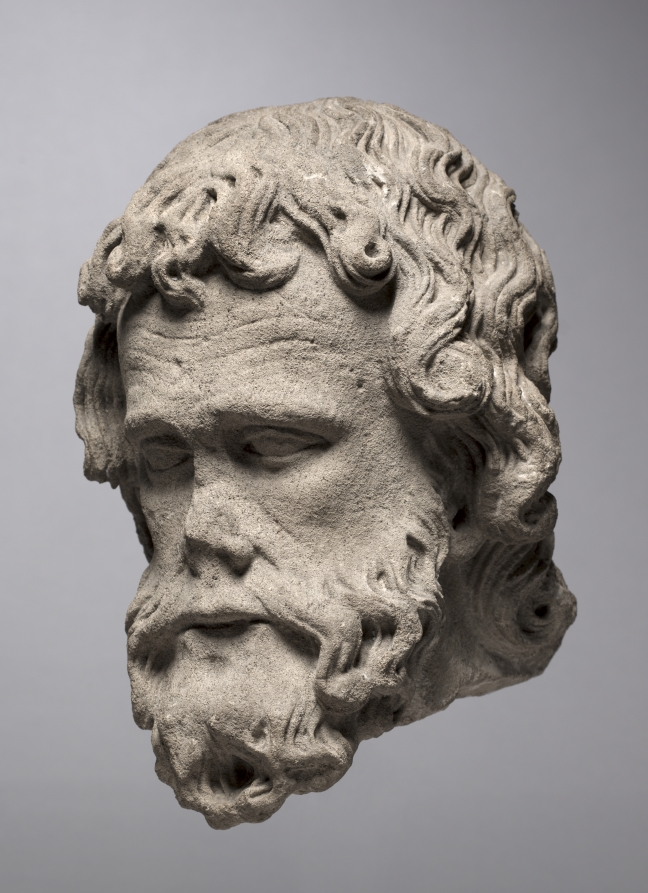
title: Head of an Apostle from the South Portal of the Cathedral of Thérouanne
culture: Northern France (Pas-de-Calais), Thérouanne, 13th century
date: c. 1235–1240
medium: oolitic limestone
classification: Sculpture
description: These monumental stone heads are among the substantial known remains of the sculptural program of Thérouanne’s cathedral, which was razed by Emperor Charles V of Spain in June 1553. These heads were found in a wall of rue Ste. Croix in the town of Saint Omer (a short distance to the north) in January 1923. This group of sculptures from the gable of the south portal of Thérouanne, which includes a stylistically related Christ as Judge, is recorded to have been moved to the Cathedral of Saint Omer in 1554. With their deeply carved wavy hair, curly beards, wrinkled foreheads, and ponderous facial features, these imposing heads—even in their now fragmentary and weathered state—attest to the powerful monumentality of the stone sculpture covering French church facades of the Gothic period.